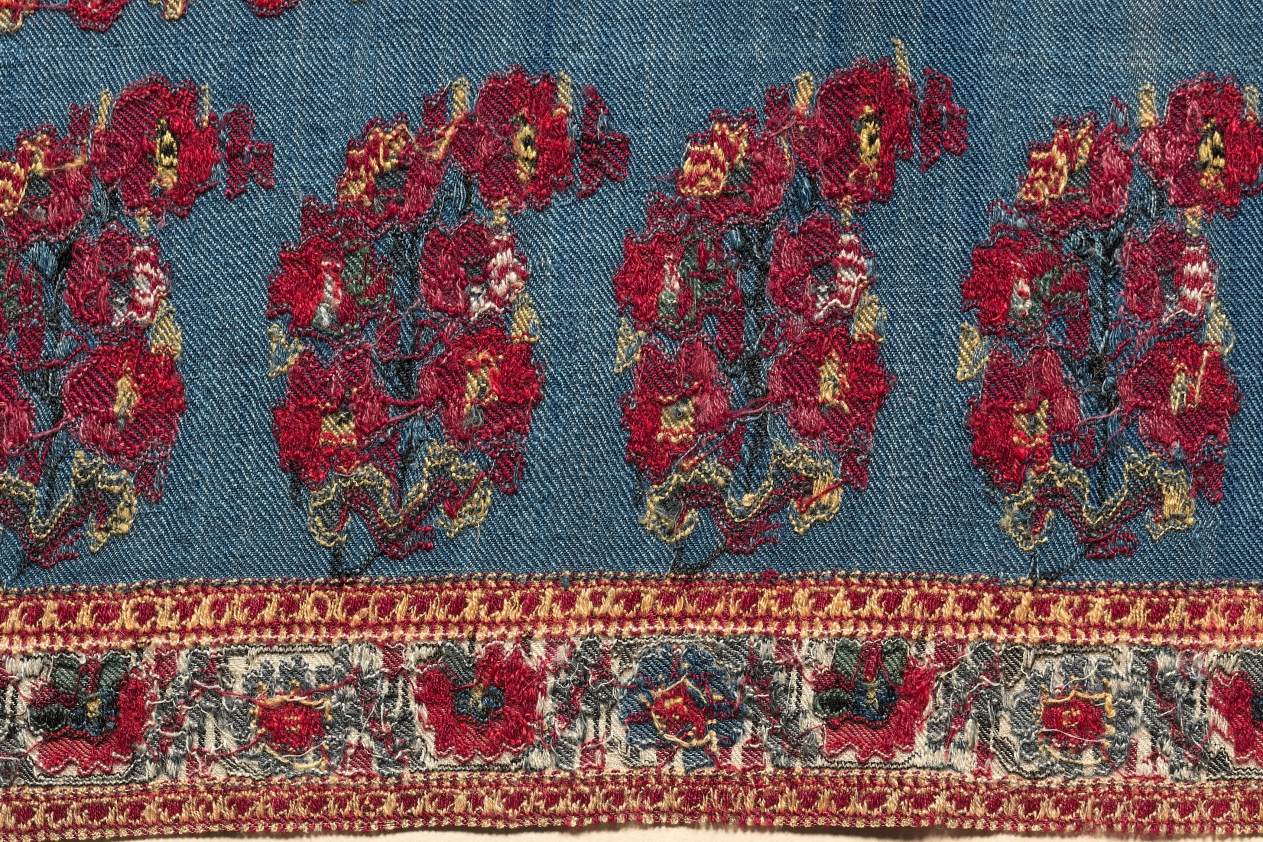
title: Shawl with boteh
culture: India, Kashmir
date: 1820–1830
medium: 2/2 twill tapestry weave, double interlocked: wool, possibly pashmina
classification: Textile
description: Thousands of luxurious shawls imported from Kashmir, India, were status symbols that European-manufactured imitations could not equal. Those woven in Paisley, Scotland, gave rise to the popular term paisley. Their representation in portraits records the evolution of shawl fashions, which helps to date surviving examples. The coveted quality of Kashmir shawls was achieved with luxurious fine goat hair woven in twill tapestry to form small colorful blossoms. Such shawls are lightweight, supple, and warm. A plethora of blossoms arranged in small vases on stands form the large paisley or boteh motifs, while smaller versions enliven the sides of the field. Such floral displays evolved from blossoming plants possibly in 16th-century India.